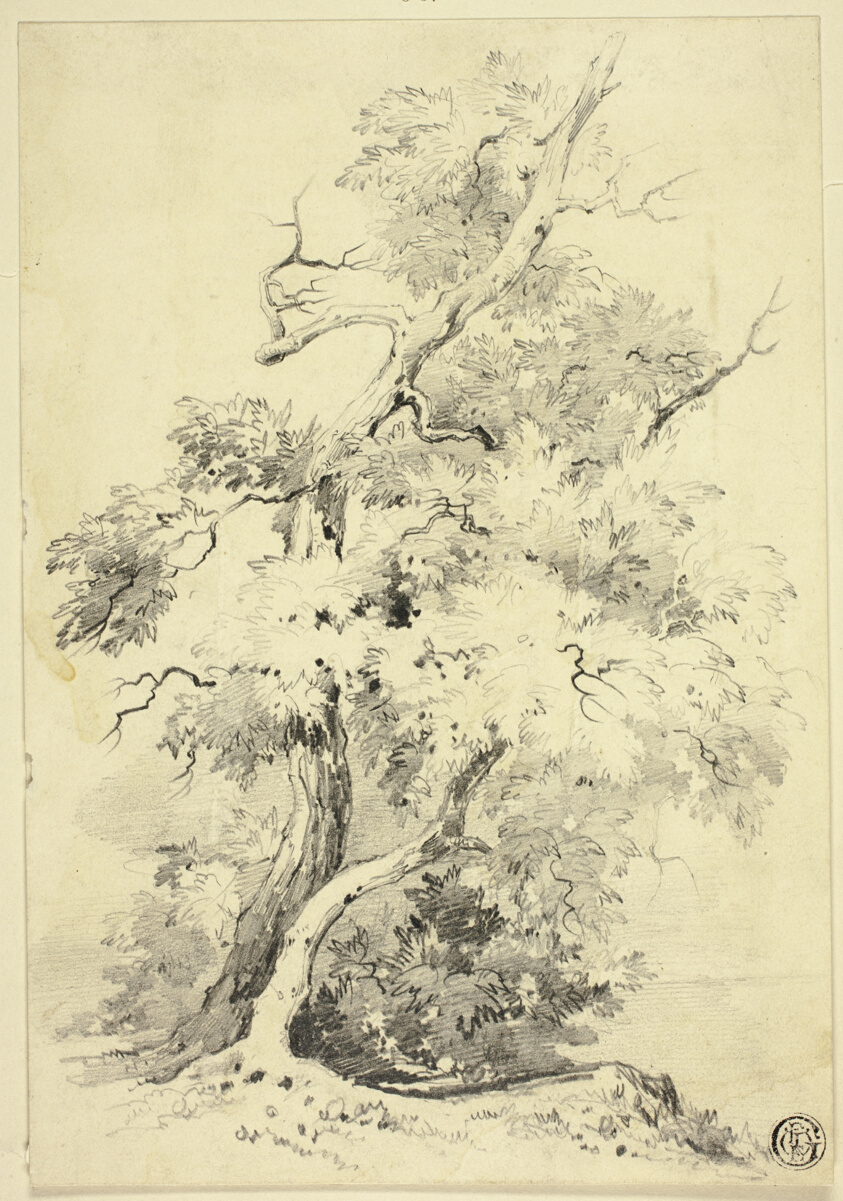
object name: Drawing and Watercolor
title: Tree on Bluff Beside Water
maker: Joshua Wilson Faulkner (English, 1770-1830)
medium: Graphite, on cream wove card, tipped on cream wove card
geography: England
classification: graphite; drawings (visual works); prints and drawing